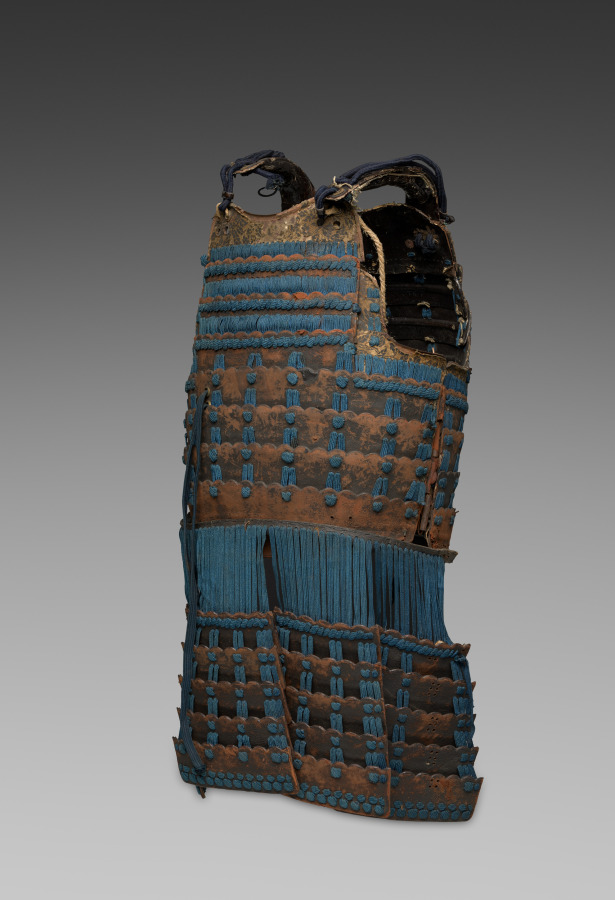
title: Cuirass (Dō)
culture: Japan, Edo period (1615–1868)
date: 1615–1868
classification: Arms and Armor